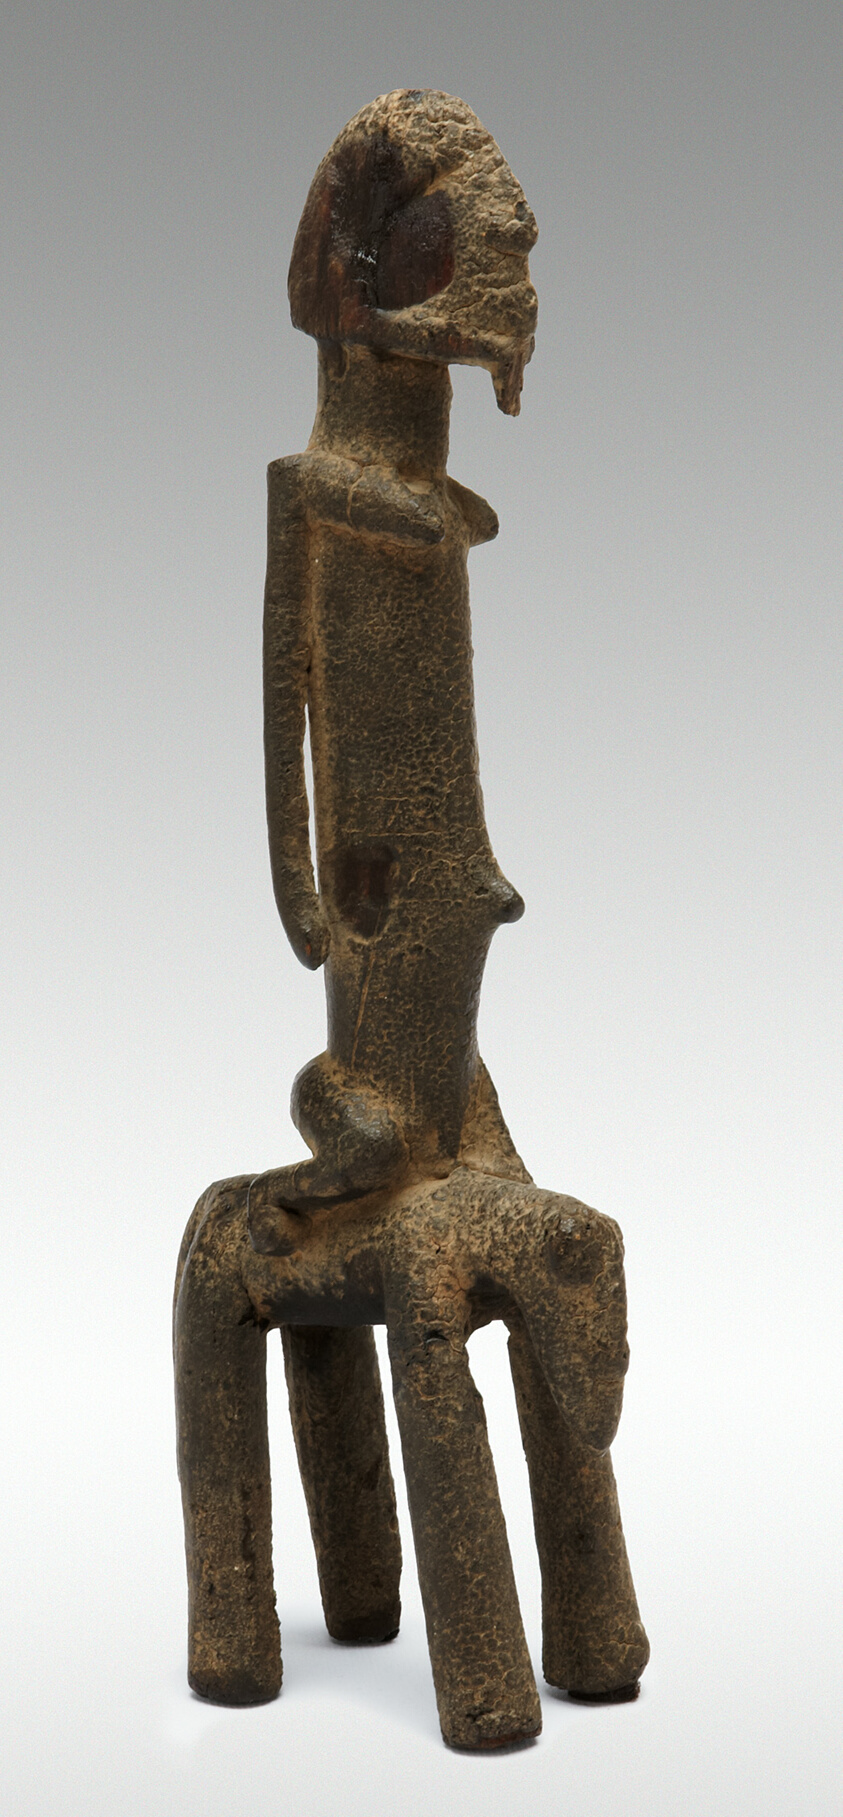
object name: Sculpture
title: Equestrian Figure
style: dogon, Arts of Africa, african Art, tellem, Northern Africa and the Sahel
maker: Dogon or Tellem; Bandiagara region, Mali; Northern Africa and the Sahel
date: 16th/19th century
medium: Wood and sacrificial material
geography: Mali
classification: sculpture; wood; arts of Africa; african art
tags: equestrian, animals, rider, horse